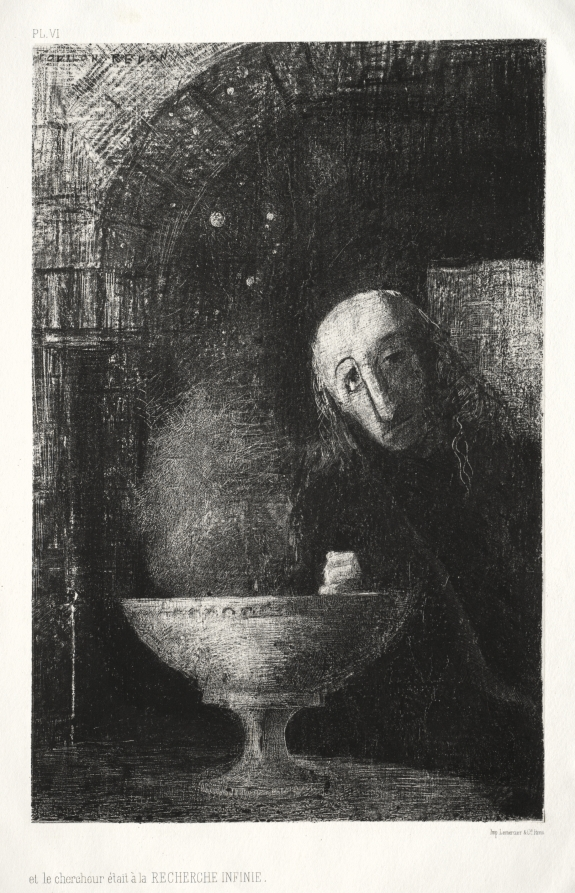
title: And the Searcher was Engaged in an Infinite Search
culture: France, 19th century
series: The Night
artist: Odilon Redon (French, 1840–1916)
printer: Lemercier & Cie.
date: 1886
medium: lithograph on China paper on wove paper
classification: Print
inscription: signed on stone, upper left: ODILON REDON; printed, below lower left corner of image: et le chercheur était à la recherche infinie; below lower right corner of image: Imp. Lemercier & Cie. Paris; above upper left corner of image: PL. VI.